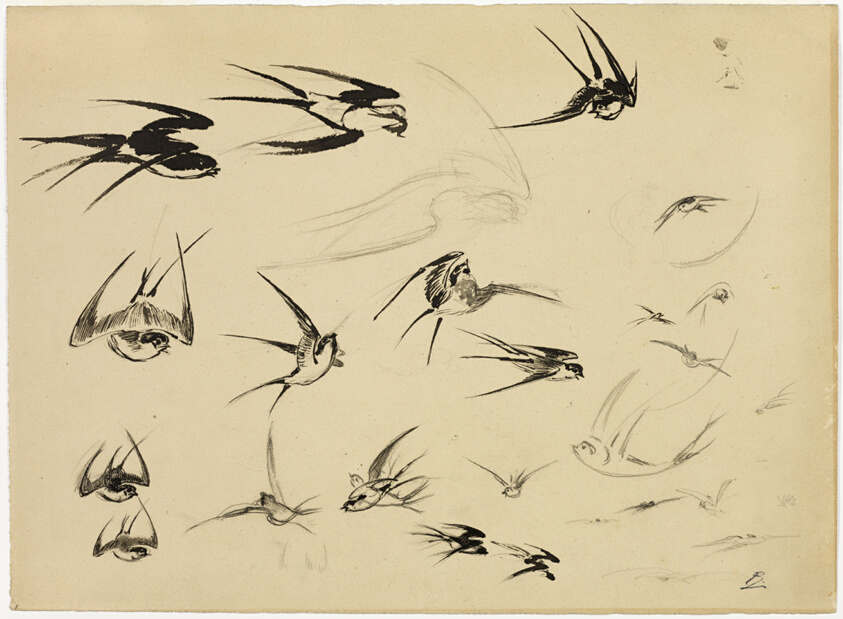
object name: Drawing and Watercolor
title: The Swallows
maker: Félix Henri Bracquemond (French, 1833–1914)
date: c. 1881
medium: Pen and brush and black ink, with black chalk and graphite and touches of black Conté crayon, on tan wove paper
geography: France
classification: pen and ink drawings; drawings (visual works); prints and drawing